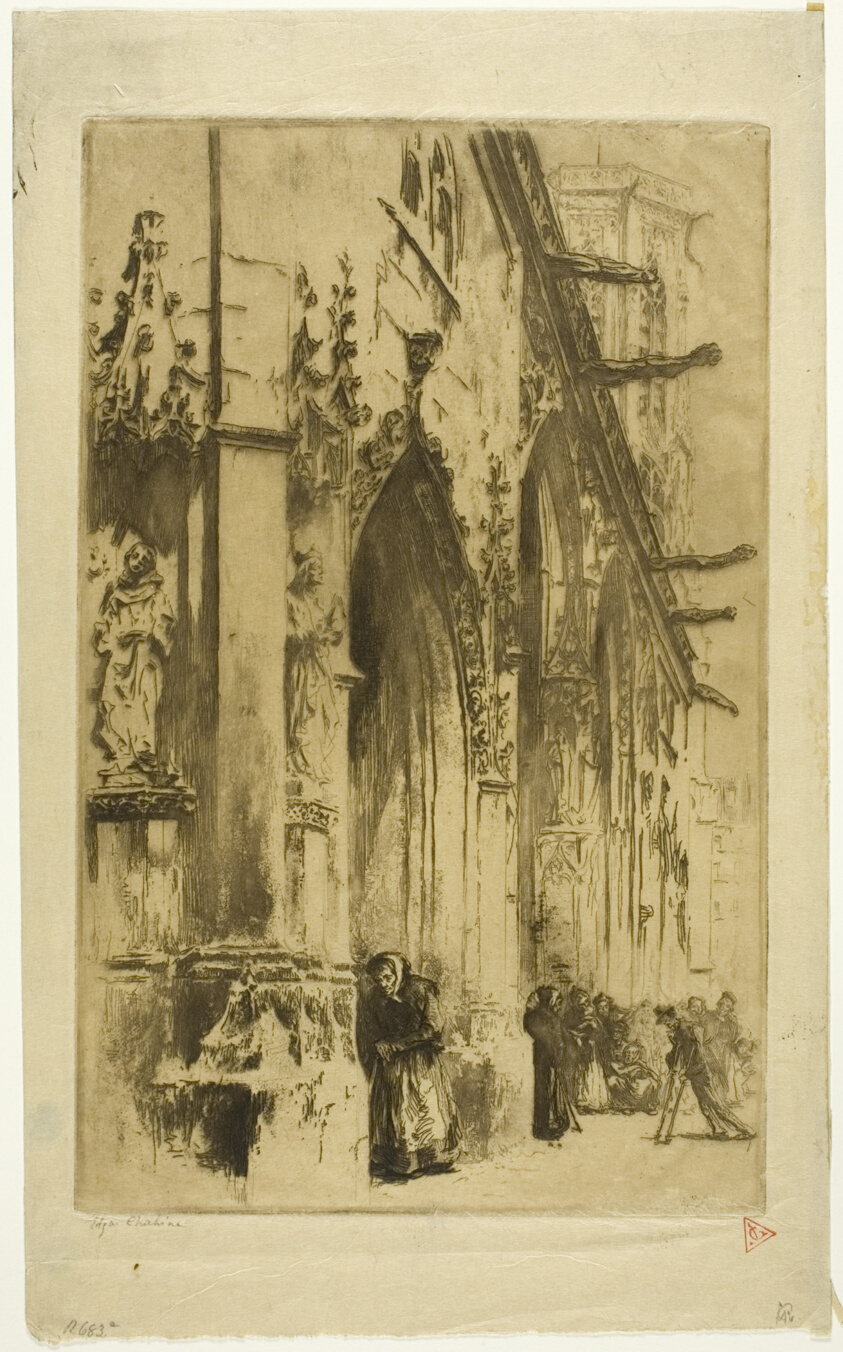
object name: Print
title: Entrance to Saint-Germain-l'Auxerrois, Paris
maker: Edgar Chahine (French, 1874-1947)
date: 1902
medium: Etching and aquatint in dark brown on cream Japanese paper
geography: France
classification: etching; print; prints and drawing